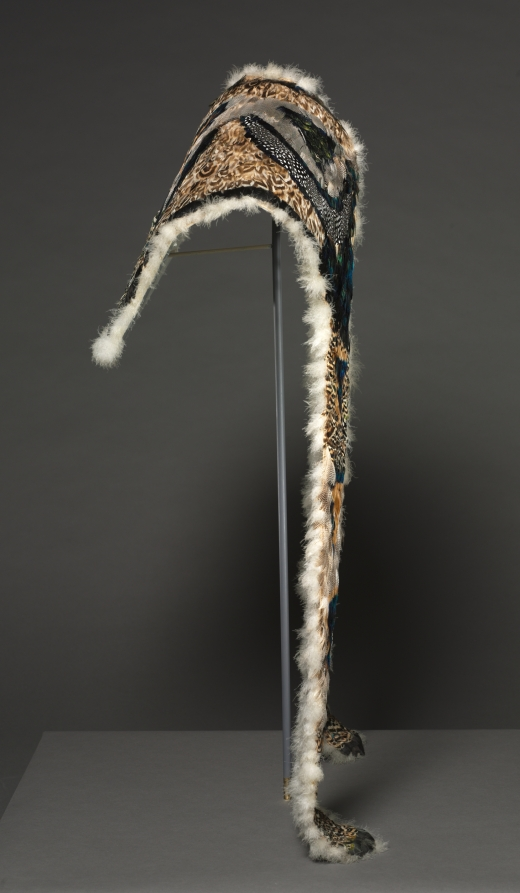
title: Pelerine (Collar or Cape)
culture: Northeastern Woodlands, Great Lakes/St. Lawrence River Region or Europe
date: c. 1830–1860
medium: Cotton, peacock feathers, guinea fowl feathers?, Gadwalls duck feathers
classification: Textile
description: Experts argue about collars of this type: Did a Great Lakes native artist make it, using as a model an English lady’s pelerine and exotic feathers obtained through trade? Or was the collar created by a European feather worker, perhaps after seeing the spectacular feather capes of native Hawaiian royals who visited England in 1824? There are arguments for both views—and for further research.